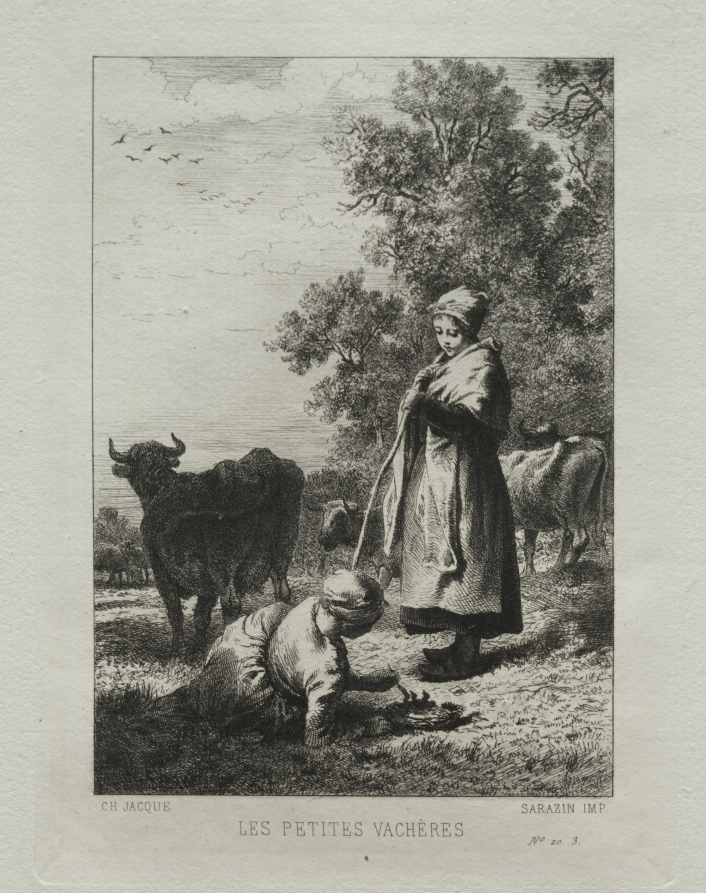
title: The Little Cowherds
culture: France, 19th century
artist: Charles-Émile Jacque (French, 1813–1894)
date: 1864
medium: etching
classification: Print